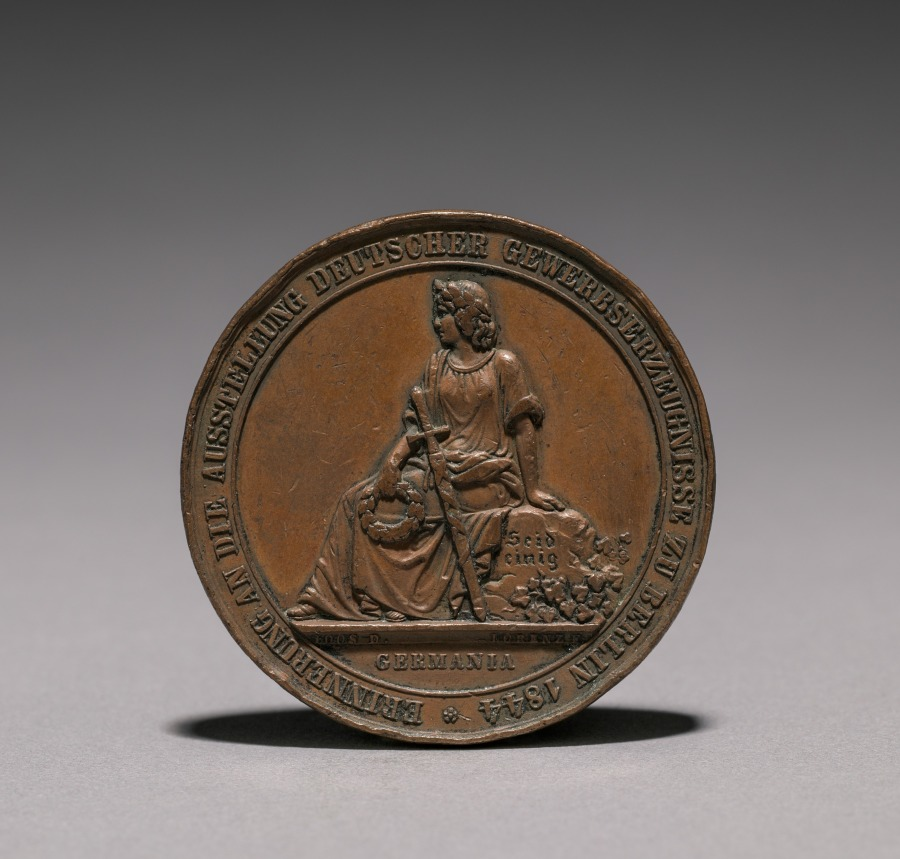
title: Medal Commemorating the Exhibition of Textiles, Berlin, 1844 (obverse)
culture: Germany, 19th century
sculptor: Emil Schilling (German)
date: 1844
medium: bronze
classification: Metalwork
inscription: "ERNNERUNG AN DIE AUSSTELLUNG DEUTSCHER GEWERBSERZEUGNISSE ZU BERLIN 1844 GERMANIA."